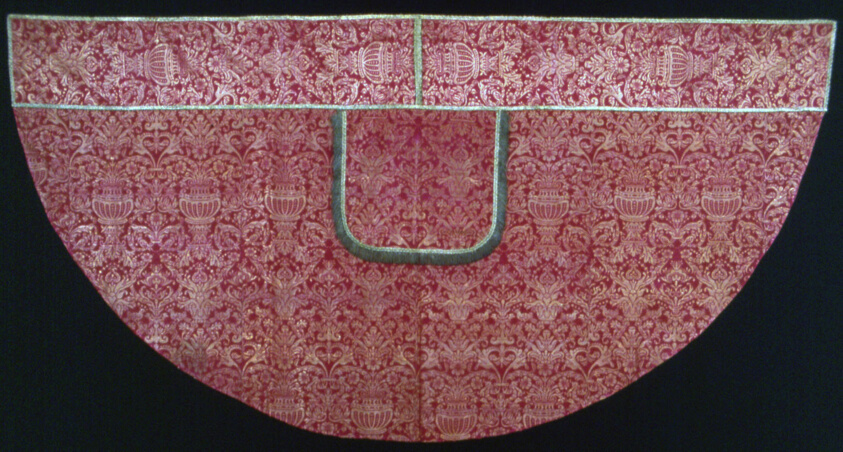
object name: Textile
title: Cope with Hood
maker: Italy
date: 19th century (adaptation of a 17th century textile design)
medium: Silk, wild silk and gilt-metal-strip, plain weave with plain interlacing of secondary binding warps and supplementary patterning wefts; edged with silk and gilt-metal-strip-wrapped linen, plain weave with supplementary patterning wefts forming weft loop fringe; lined with silk, plain weave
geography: Italy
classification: textile; weaving; liturgical; costume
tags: urns, foliage, flowers